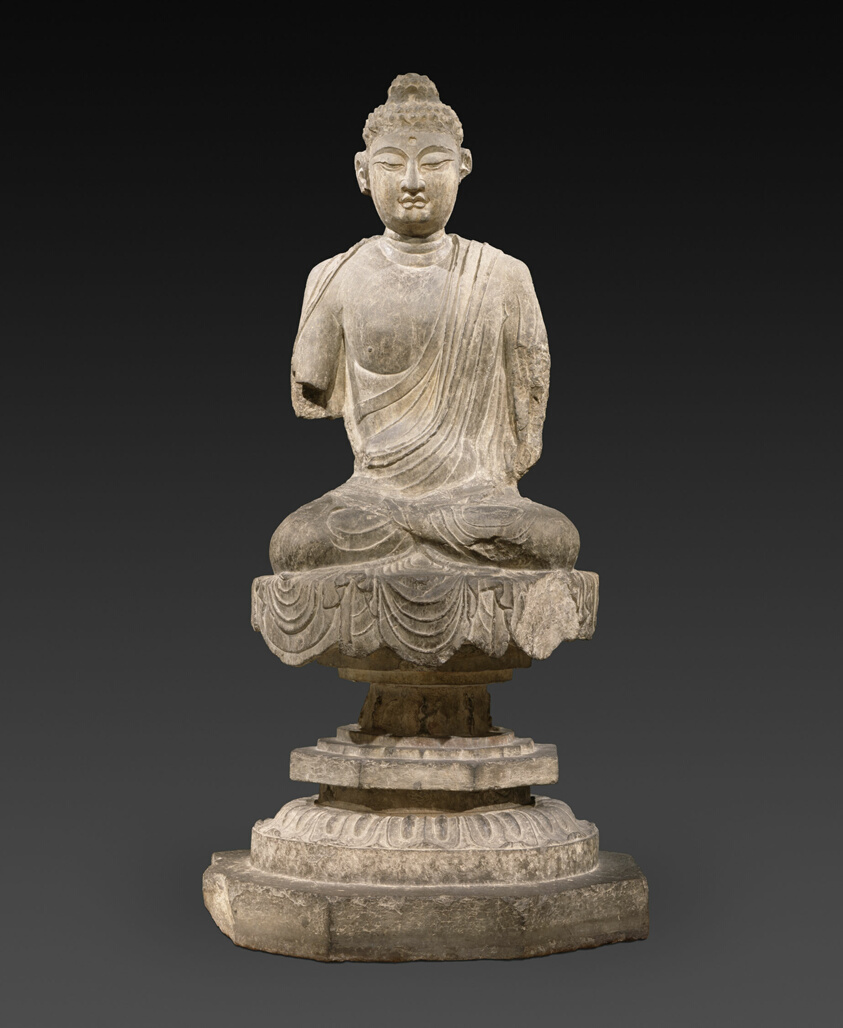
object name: Sculpture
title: Buddha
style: Chinese (culture or style)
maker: China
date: Tang dynasty (A.D. 618–907), c. 725/50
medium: Limestone with traces of polychromy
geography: China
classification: stone; sculpture; asian art